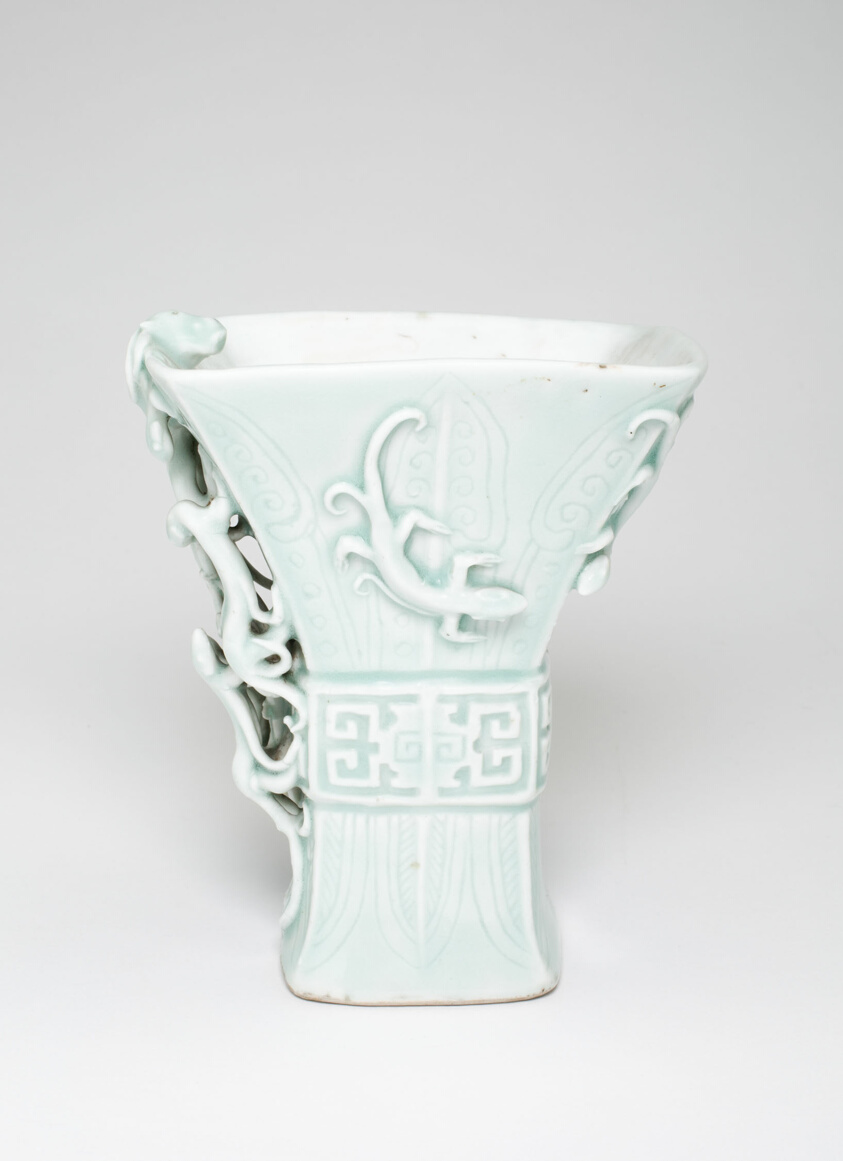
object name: Vessel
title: Cup in the Shape of an Archaic Bronze Vessel with Lizards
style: Chinese (culture or style)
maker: China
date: Qing dynasty (1644–1911), 18th/19th century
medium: Celadon-glazed porcelain with underglaze molded and incised decoration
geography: China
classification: drinking vessel; porcelain; vessel; asian art; ceramics